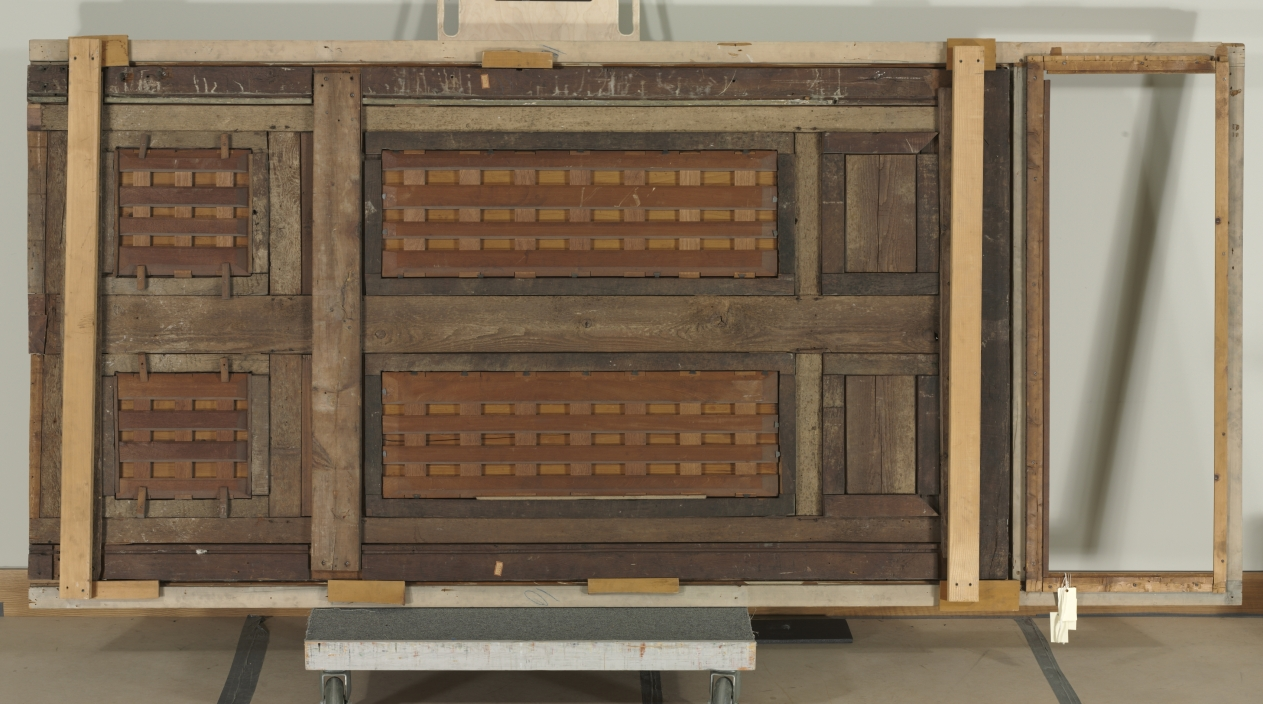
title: Double-Leaf Doors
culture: France, 18th century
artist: Pierre Rousseau (French, 1751–1829)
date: 1790s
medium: oil on wood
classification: Painting